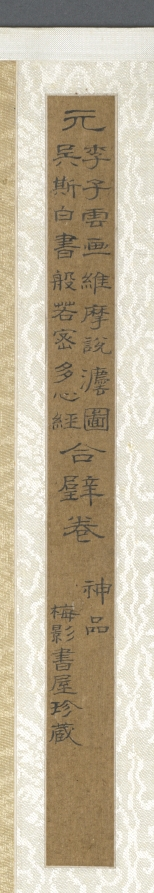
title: Buddha's Conversion of Five Bhiksu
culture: China, Yuan dynasty (1271–1368)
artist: Li Sheng (Chinese, active c. 1324–after 1375)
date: mid-1300s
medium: handscroll; ink on paper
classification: Painting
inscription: 紫篔生李升識 [印] 李氏子雲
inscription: 4 colophons and 12 additional seals: The "Heart" Sutra (Maha Prajnaparamita) text written by Wu Yuqing 吳餘慶 (active early 1400s); 2 seals of Xu Qianxue 徐乾學 (1631–1694); 3 colophons, one dated 1929 and two dated 1936, and 9 seals of Wu Hufan 吳湖帆 (1894–1968); 1 colophon, dated 1932, of Chen Dingshan; 1 seal unidentified.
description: This episode stems from the life of the historical Buddha, who, after his enlightenment, was initially hesitant about preaching his own doctrine. After much personal deliberation and prodding by deities, he finally relented. The first converts were the five guards who served him when he was still a prince. For Li Sheng, this is the pretext of the painting, which moves from the interaction of the bhiksu with the Buddha to a broader awareness of the vast surroundings of the scene.